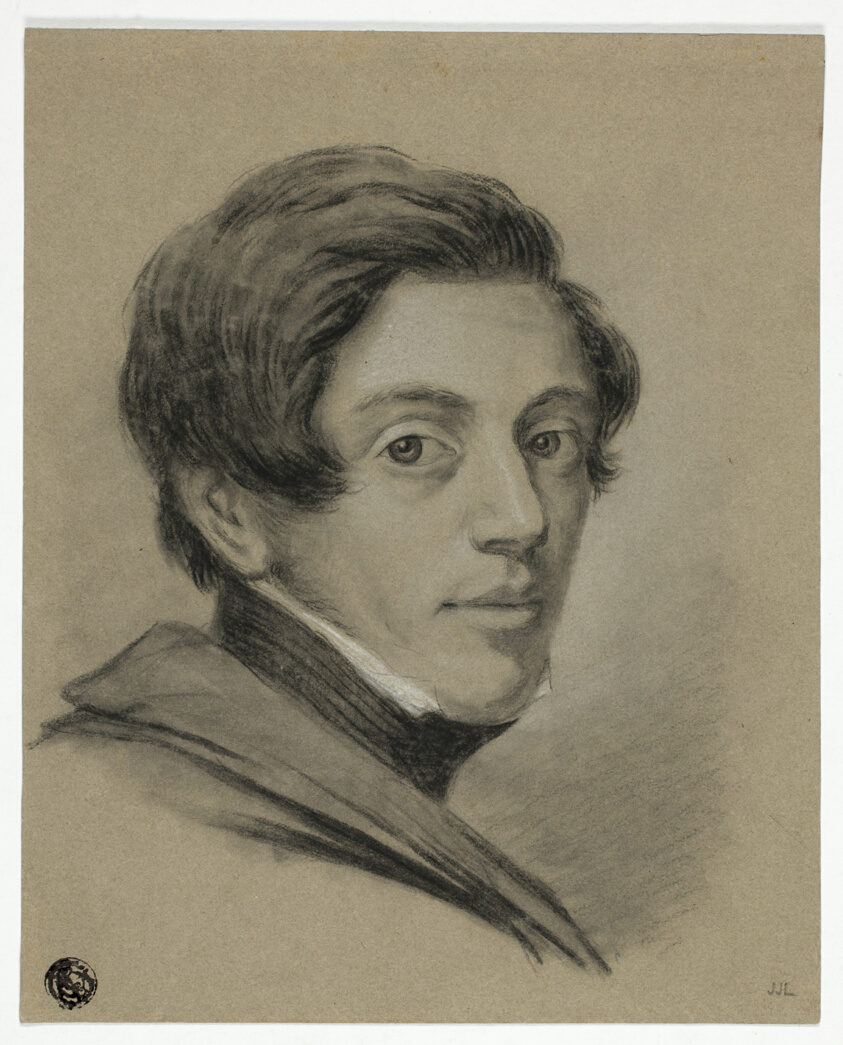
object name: Drawing and Watercolor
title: Self-Portrait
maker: Johannes Cornelis Haccou (Dutch, 1798-1839)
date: 1835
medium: Charcoal, with stumping, and touches of graphite, heightened with white chalk, on grayish-brown wove paper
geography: Holland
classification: charcoal; drawings (visual works); prints and drawing